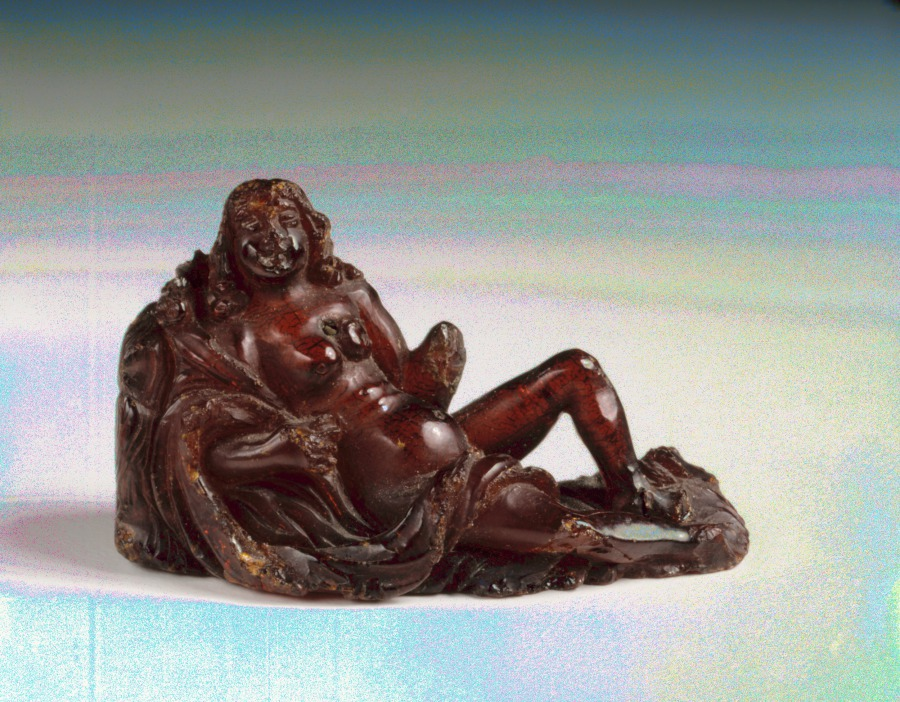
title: Statuette of a Reclining Woman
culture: Greek, Hellenistic, or Roman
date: c. 100 BCE–100 CE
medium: amber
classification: Sculpture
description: This tiny statuette is made from amber, or fossilized tree sap. A nude woman reclines against a rocky feature, surrounded by sumptuous piles of fabric which wind around her right arm and leg. Her gaze is upturned, loose hair framing her face. There are cracks throughout the figure, and she is missing both hands and some of her face. She may represent a nymph or maenad.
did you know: Amber can range in color from bright yellow to deep red depending on its origins.